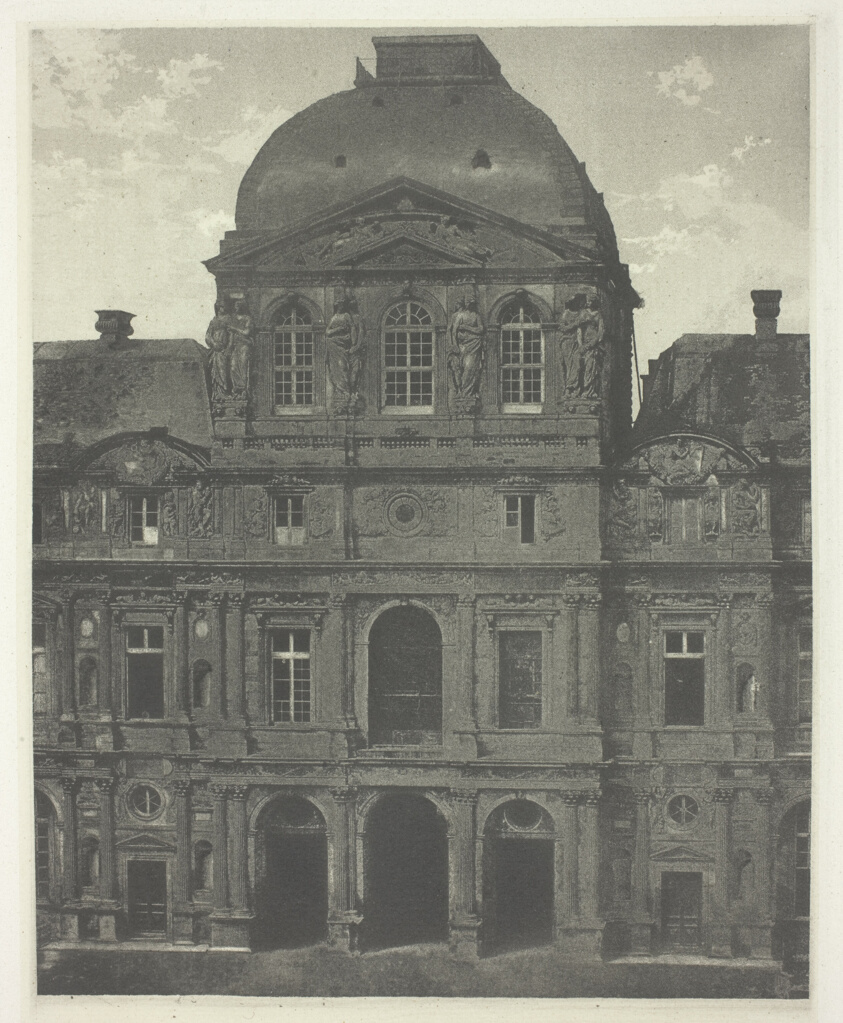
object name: Photograph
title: Paris: Pavillon de l'Horloge, the Louvre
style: 19th century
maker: Charles Nègre (French, 1820–1880)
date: c. 1855, printed 1982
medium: Photogravure, from the portfolio Charles Negre: Treize Heliogravures, 1854-1857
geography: France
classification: photogravure; photomechanical process; photography; photograph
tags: Paris